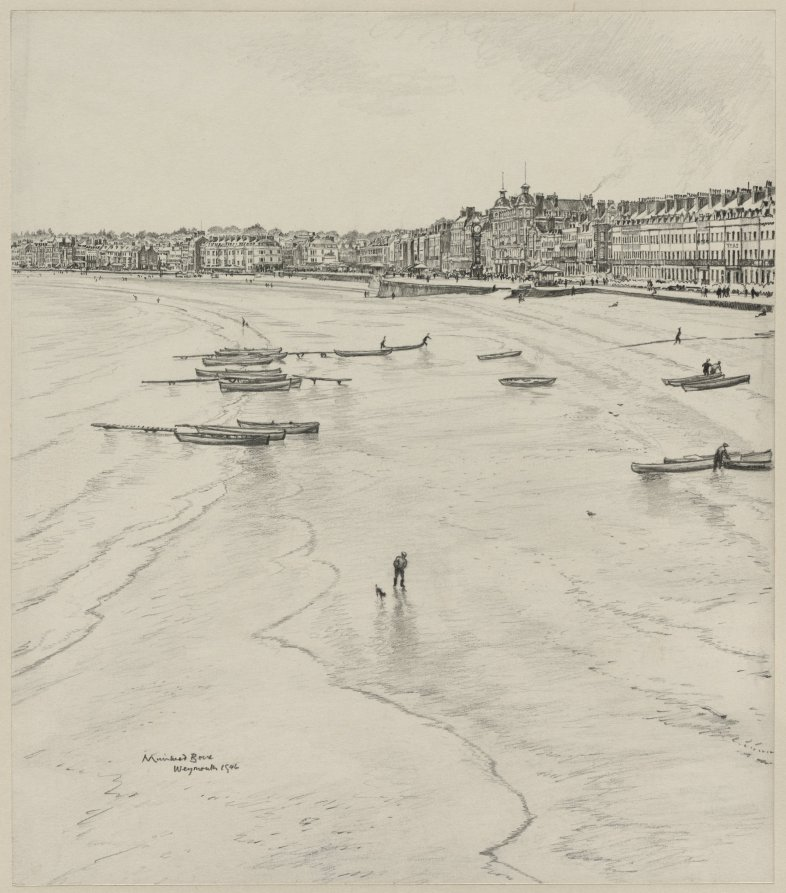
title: Weymouth Bay, The Off Season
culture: England, 20th century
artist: Muirhead Bone (British, 1876–1953)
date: 1946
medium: graphite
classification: Drawing